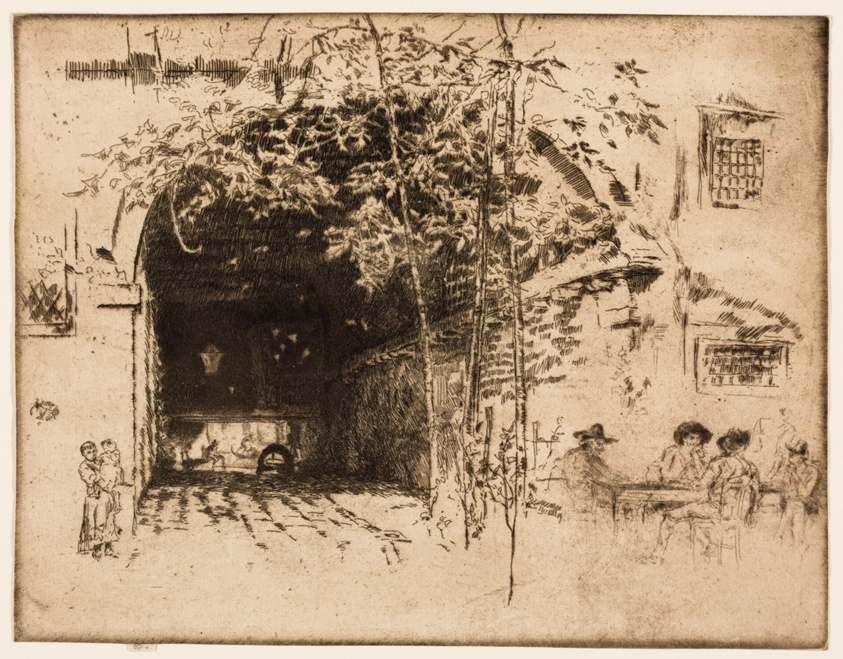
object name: Print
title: The Traghetto, No. 2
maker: James McNeill Whistler (American, 1834-1903)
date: 1880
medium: Etching and drypoint with foul biting in black ink on ivory laid paper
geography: United States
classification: etching; foul biting; print; prints and drawing; paper; drypoint